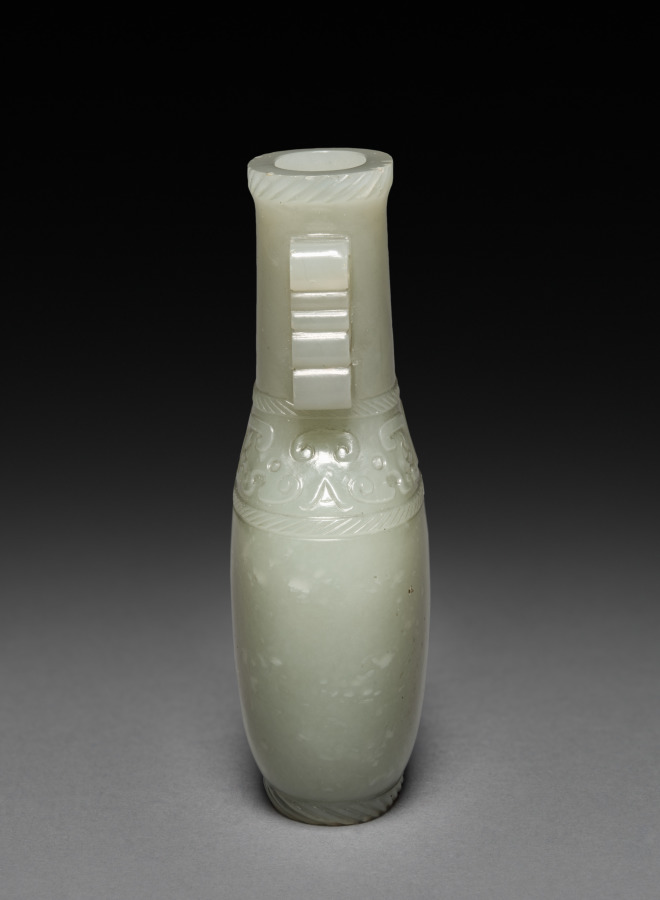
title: Bottle with Stopper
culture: China, Qing dynasty (1644–1911), Qianlong reign (1736–95)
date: 1736–95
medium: jade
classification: Jade